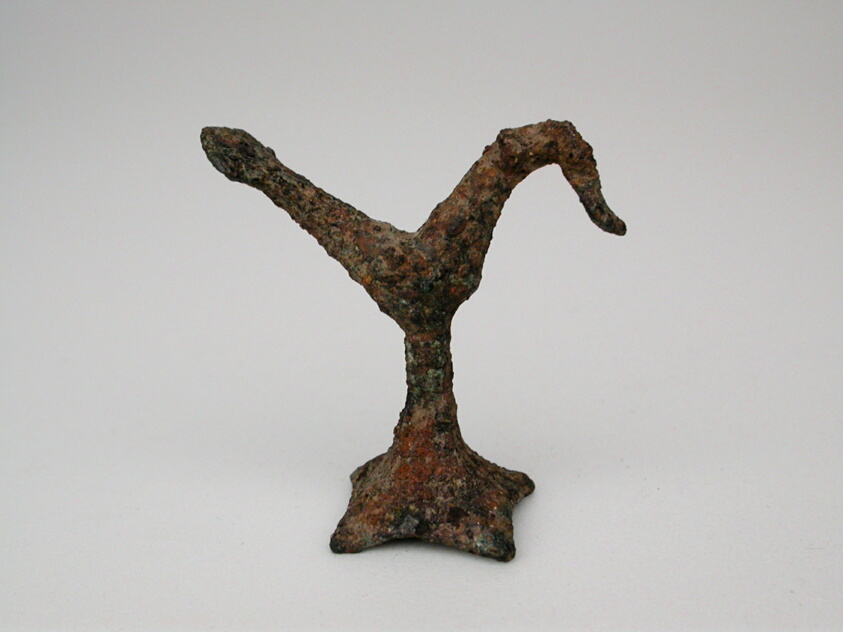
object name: Sculpture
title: Bird on a Stand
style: geometric, ancient, greek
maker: Greek; Thessaly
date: Geometric Period (about 700 BCE)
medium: Bronze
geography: Greece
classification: votive offering; ex-voto; sculpture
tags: bird